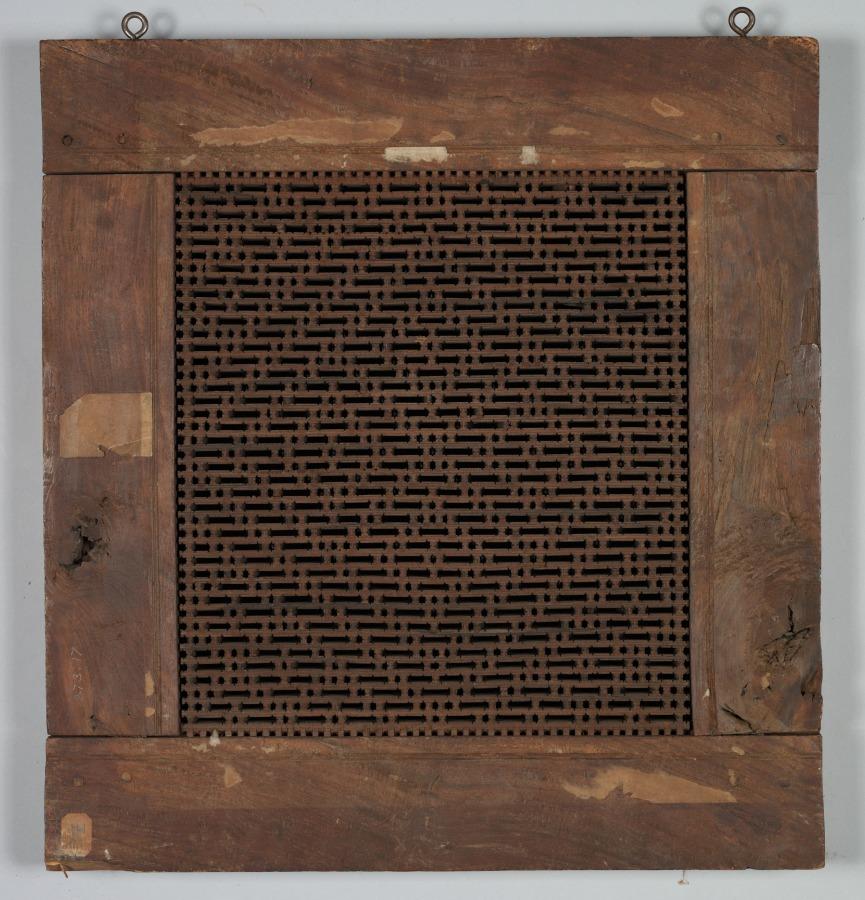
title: Wood Panel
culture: Syria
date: 1800s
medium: wood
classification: Wood